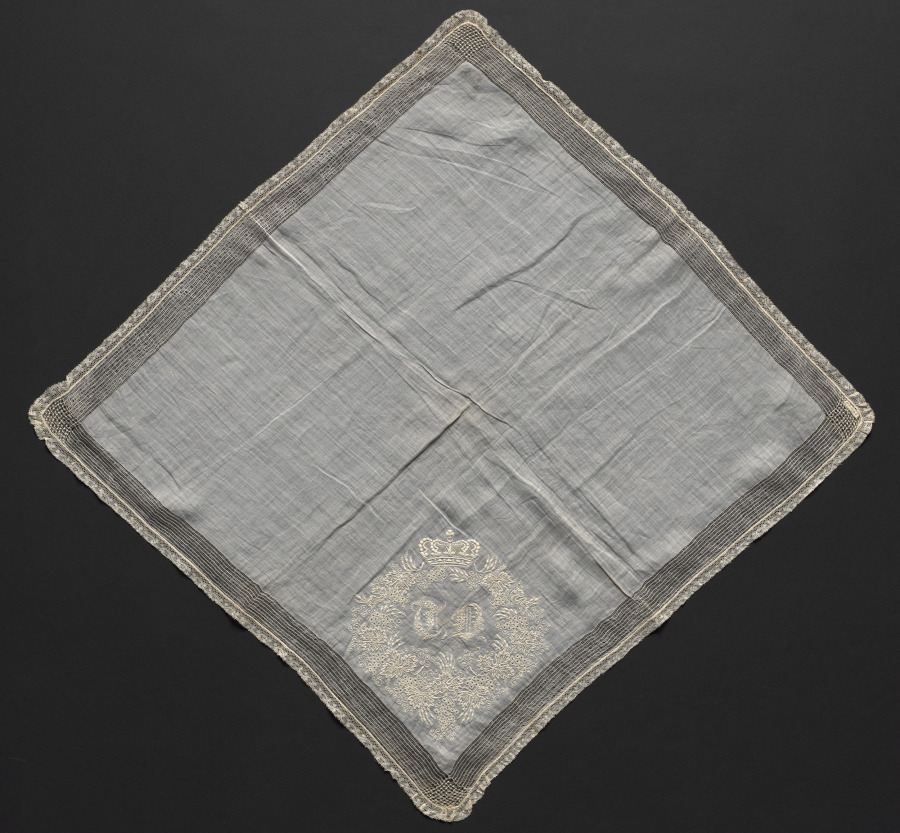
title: Lace Handkerchief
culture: France(?)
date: 1700s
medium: Plain weave linen ground; needle lace (drawnwork), bobbin lace (Valenciennes lace) edging and embroidery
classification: Embroidery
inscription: white linen embroidery in one corner: "TD."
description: In one corner of this lace handkerchief is white-on-white embroidery depicting a crown with the initials T D below it.